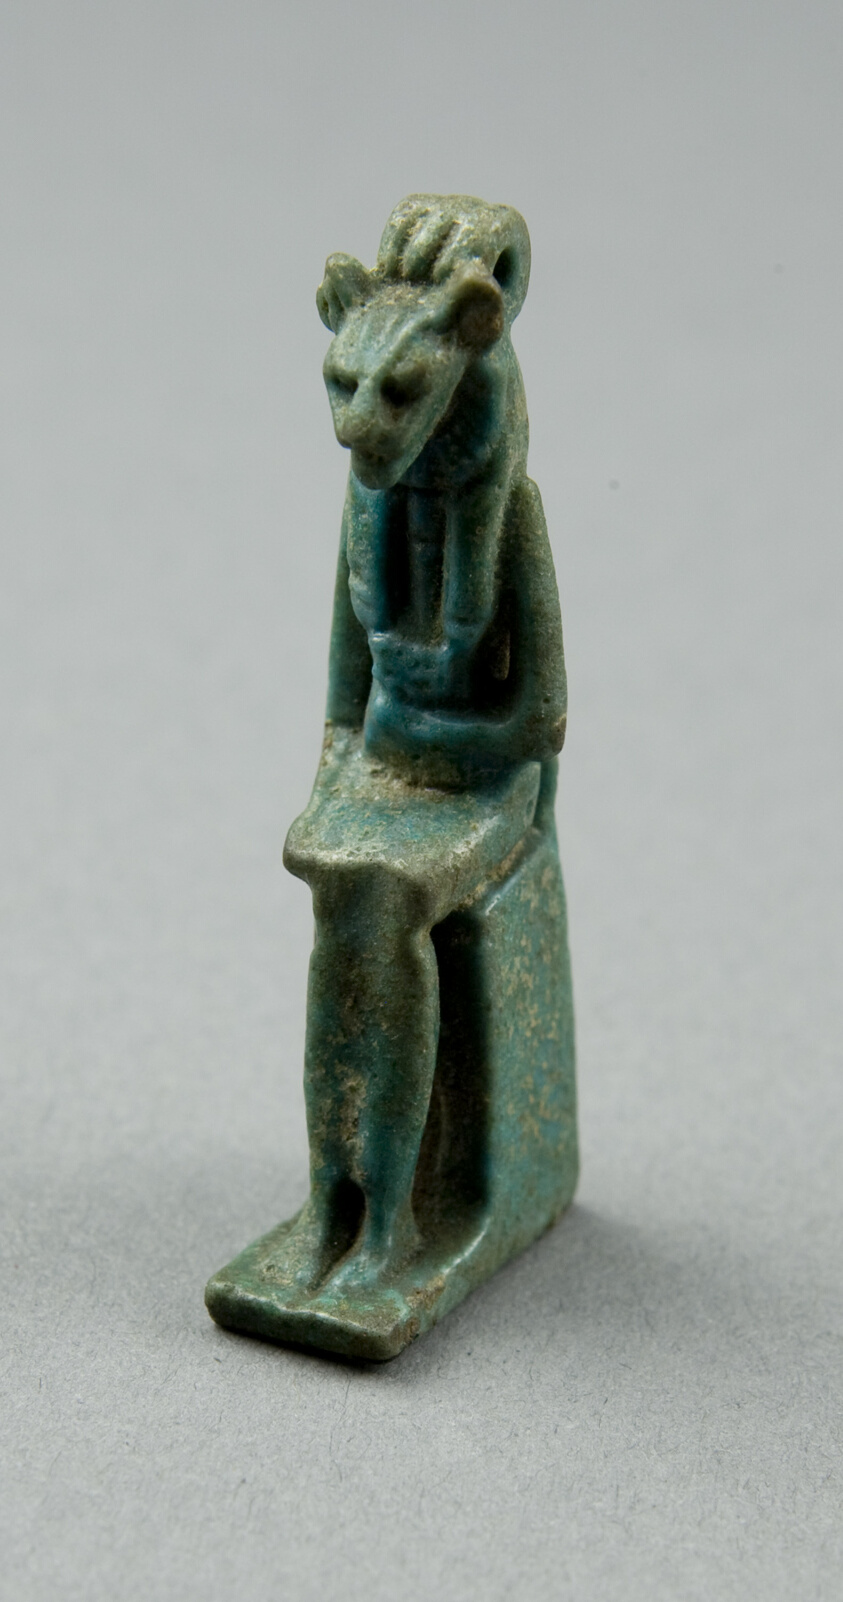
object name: Costume and Accessories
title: Amulet of the Goddess Bastet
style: third intermediate period, egyptian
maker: Egyptian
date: Third Intermediate Period, Dynasty 21–25 (1070–656 BCE)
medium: Faience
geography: Egypt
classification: amulet; jewelry; ceramics; ancient art; costume; faïence (composite material)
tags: goddesses